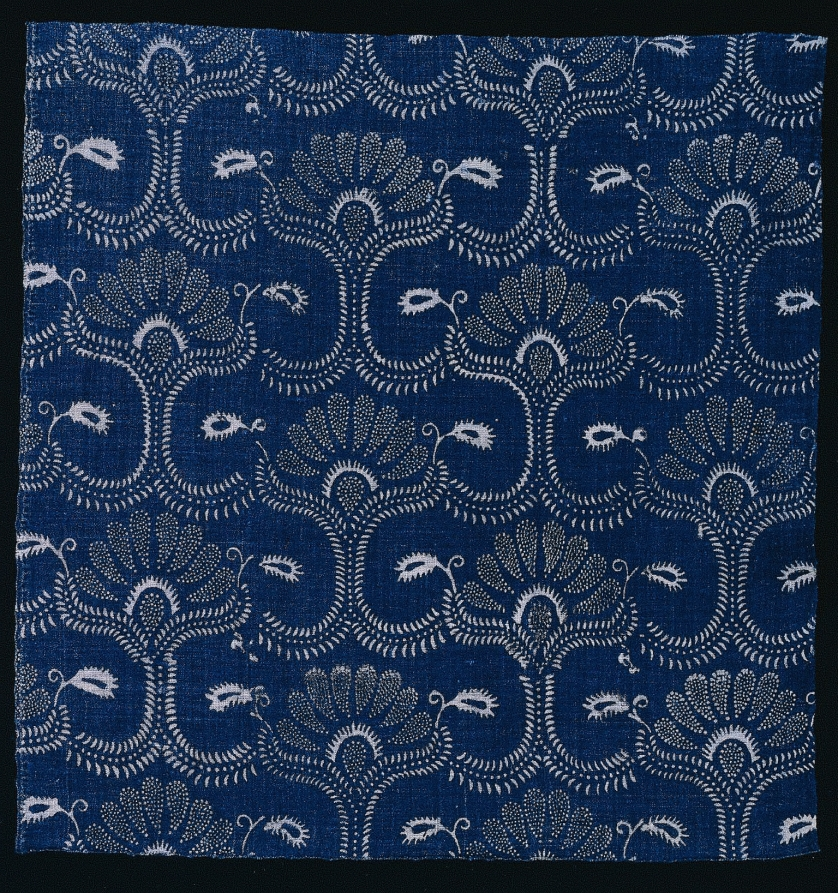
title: Loom width with Stylized Leaf Design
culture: France, Alsace, Sain-Bel, late 18th century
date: 1790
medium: wax-resist print dyed with indigo, design printed by means of woodblock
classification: Textile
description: This textile was produced in Alsace, France, located in the eastern part of the country near the border with Germany. Alsace was a leading area in the production of printed cotton. Printed cotton textiles were extremely popular in France in the late 1700s, due in part to an interest by Europeans in Indian textiles and designs. It was printed by means of a wax resist, in which a carved wood block was used to apply hot wax to the undyed surface of the fabric. After the textile was dyed with indigo, the wax was then removed by boiling the fabric in water and melting the wax so that the design was revealed.